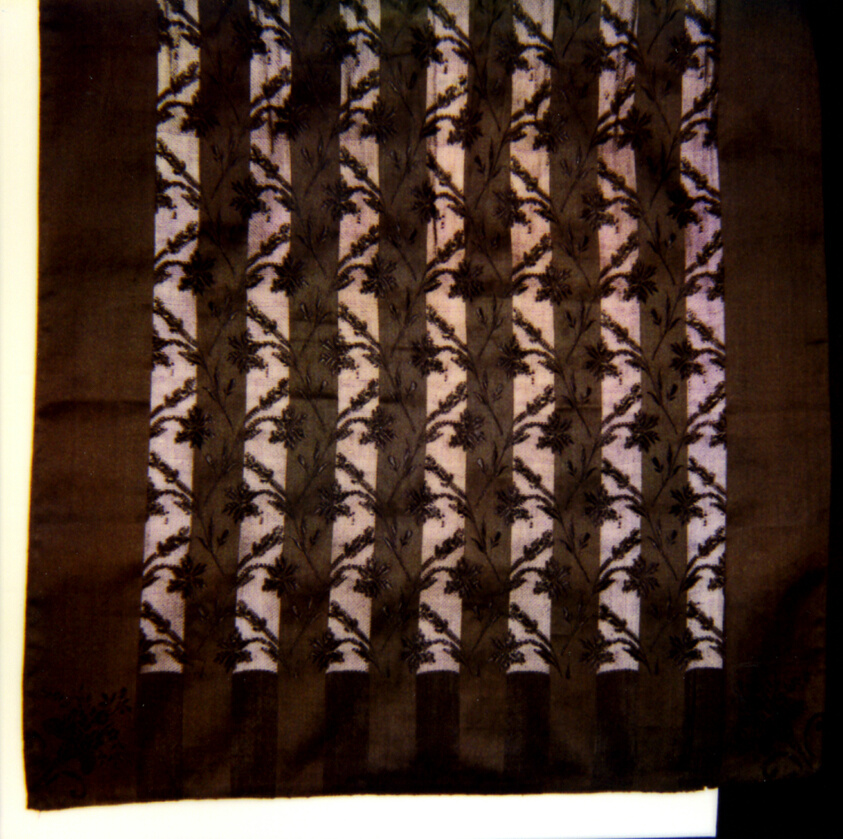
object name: Textile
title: Panel from an Apron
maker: Europe or United States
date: 1850/1900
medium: Stripes of cotton and silk, warp-float faced 7:1 satin weave self-patterned by areas of ground weft floats, and stripes of 1:1 plain gauze weave self-patterned by areas of ground weft floats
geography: Europe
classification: textile; weaving